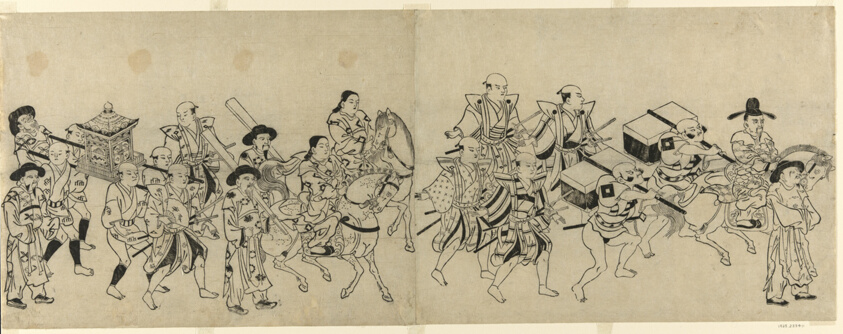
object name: Print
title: Arrival of the Korean Embassy in Edo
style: Japanese (culture or style)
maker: Torii Kiyonobu I (Japanese, 1664-1729)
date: c. 1709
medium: Woodblock print; oban sumizuri-e, 1 of 6 sheets from a 12-sheet composition (see 1925.2334a-f)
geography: Japan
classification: woodblock print; print; asian art; woodblock